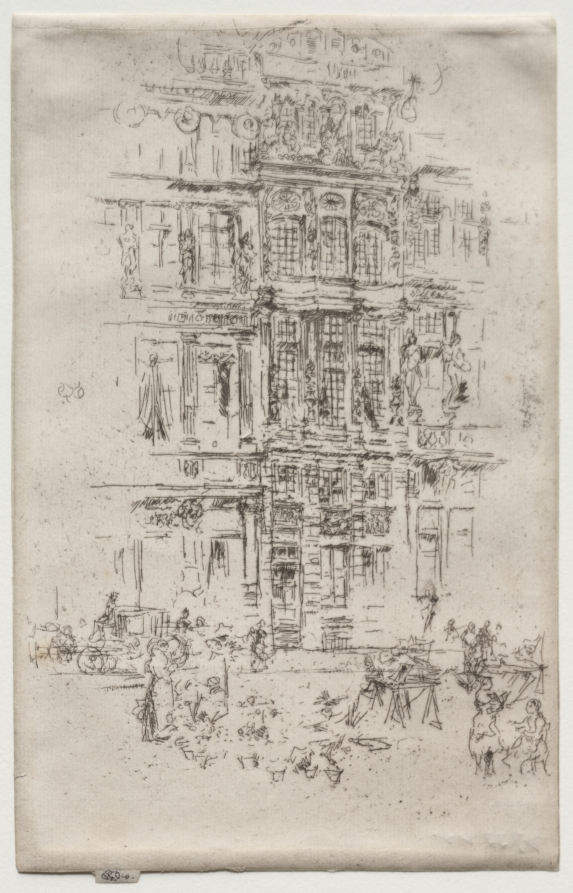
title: Palaces, Brussels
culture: America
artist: James McNeill Whistler (American, 1834–1903)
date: 1887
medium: etching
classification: Print